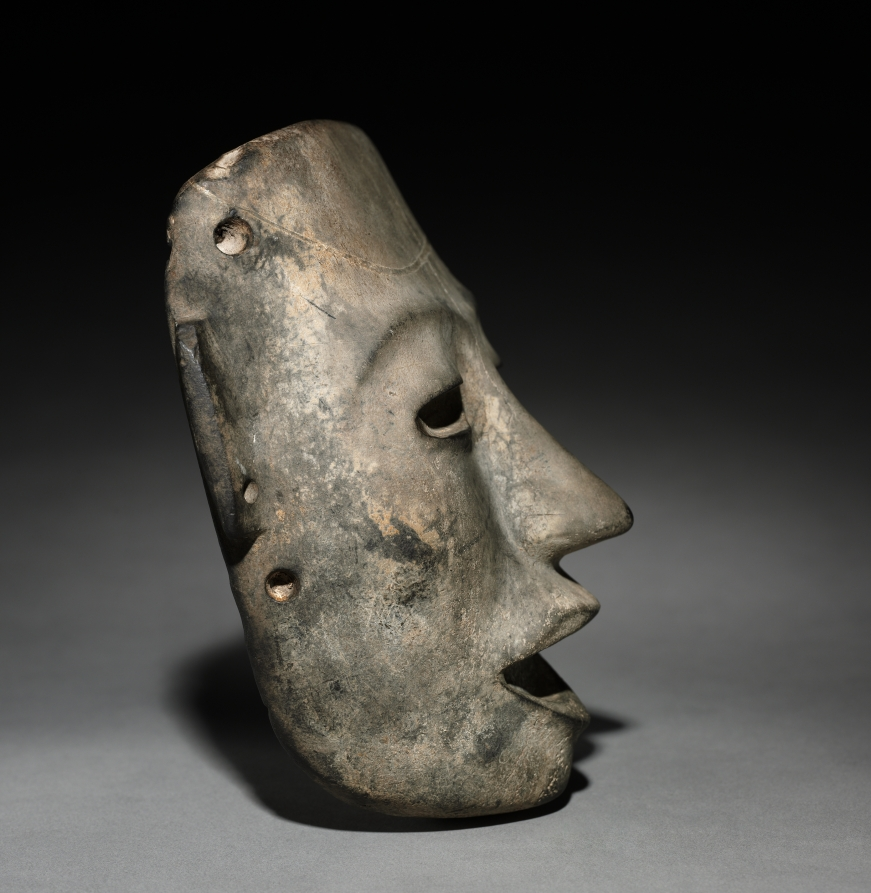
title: Mask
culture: Central Mexico, Teotihuacán style, Classic period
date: 1–550 CE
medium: stone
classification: Sculpture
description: Many Teotihuacán masks were once tied to something via holes on the back--perhaps a body-shaped form dressed in garments, ornaments, and a headdress that identified the figure. The stone masks’ eyes and mouths once held inlays representing irises, pupils, and teeth.